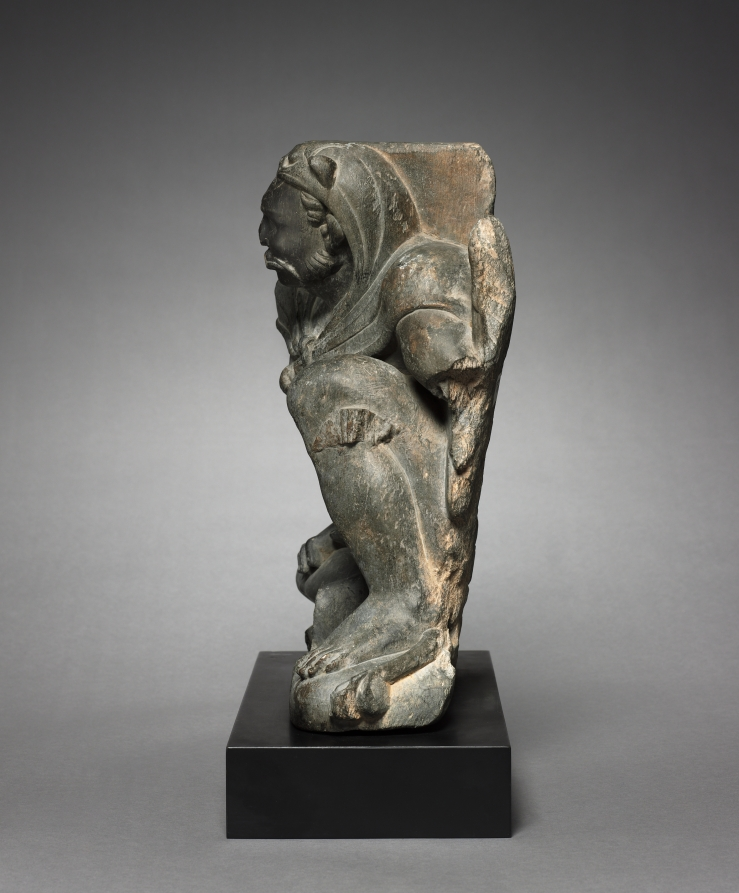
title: Winged Atlas-Hercules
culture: Pakistan, Gandhara, Gandhara period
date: 200s CE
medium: schist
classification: Sculpture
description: In Buddhist art of the Gandharan region during the time of heightened contact with the Mediterranean world, the figure of Atlas was adopted, but given wings so as to appear superhuman. This figure has been conflated with the image of Hercules, who wears the skin of the Nemean lion, and relieved Atlas of his duties for a short time. Repeated images of composite Atlas-like figures surrounded the base of the monuments called stupas, which were solid domes, and can be understood as symbols for the sky, which would have appeared as though supported by rows of titanic figures. Other examples of this figure hold a thunderbolt (vajra) in one hand, suggesting that he could also allude to Vajrapani, an early protector divinity of the Buddha. Images of Vajrapani can combine attributes of Hercules, Zeus, and Hermes.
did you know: This figure combines the attributes of Atlas, Hercules, and Vajrapani.